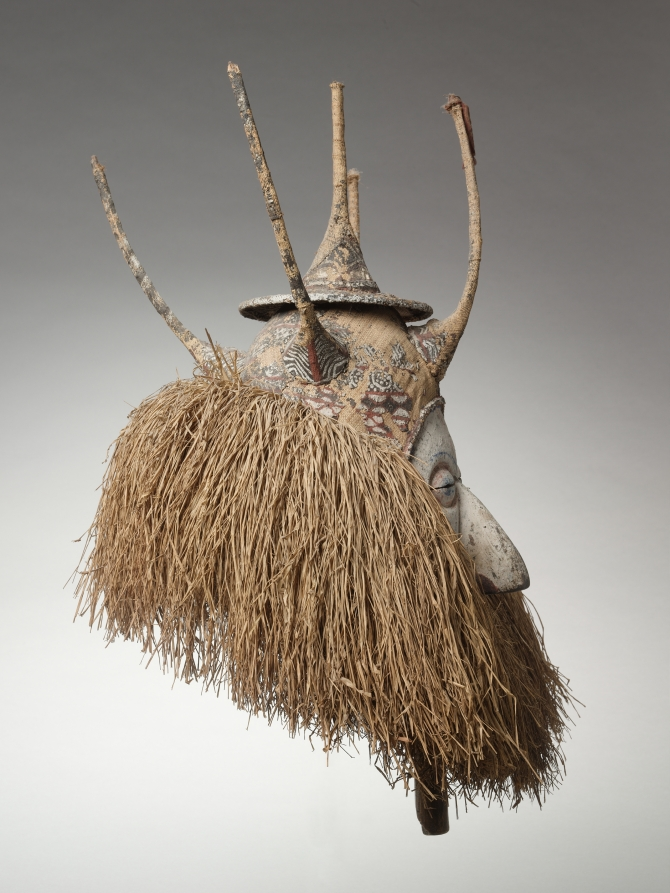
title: Mask (ndeemba)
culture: Africa, Central Africa, Democratic Republic of Congo, Yaka-style carver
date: early 1900s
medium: Wood, raffia, paint, and cotton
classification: Mask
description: This Mask (Ndeemba) has been featured prominently in the African galleries since making its debut at the Cleveland Museum of Art in 1962. Dated to the 1900s, the object is part of a group of eight masks that appear at the end of the circumcision and puberty ritual (n-khanda) for Yaka boys. It would have marked the new status of the boys who became men and commemorated their re-entry into the village. Affirming age-long tradition, such masks are worn by the master of the initiation or by the newly initiated himself.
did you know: Look under the fluffy layers of raffia fiber to see the handle; this mask was "worn" by holding it up to the face.